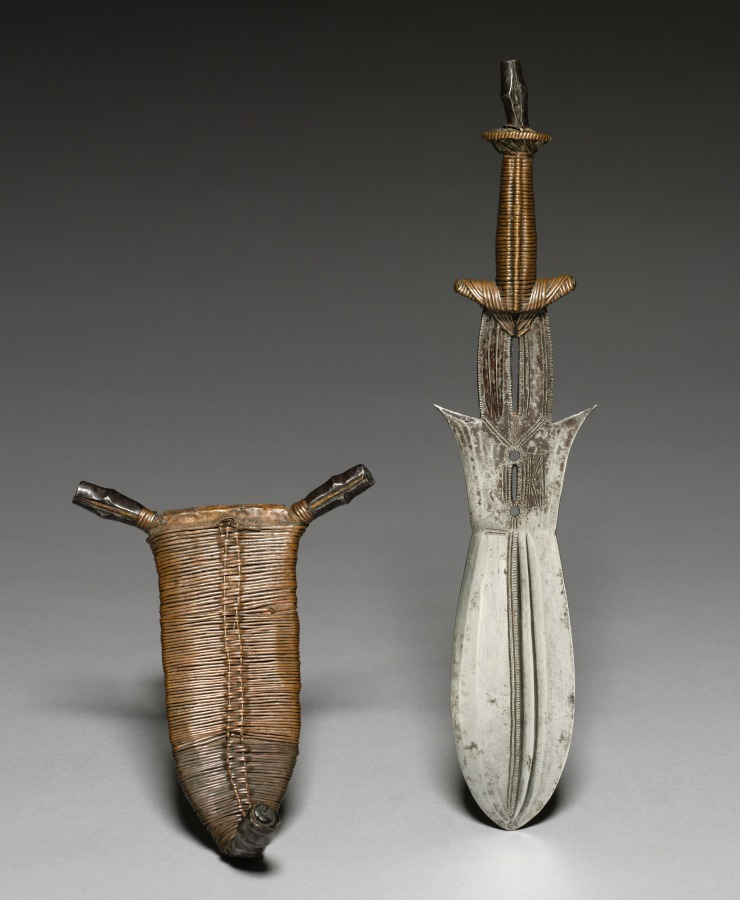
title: Knife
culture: Africa, Central Africa, Democratic Republic of the Congo, Ngbandi-style maker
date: c. 1900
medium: Iron, copper alloy, and rawhide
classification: Arms and Armor